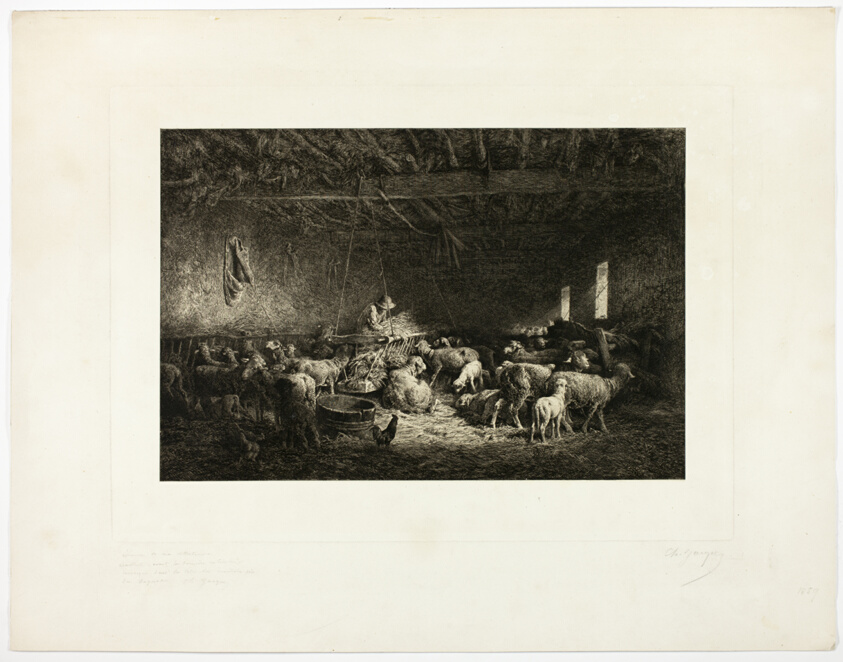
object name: Print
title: The Large Sheepcot, horizontal plate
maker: Charles Émile Jacque (French, 1813-1894)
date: 1859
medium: Etching, engraving and drypoint on ivory wove paper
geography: France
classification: etching; print; prints and drawing